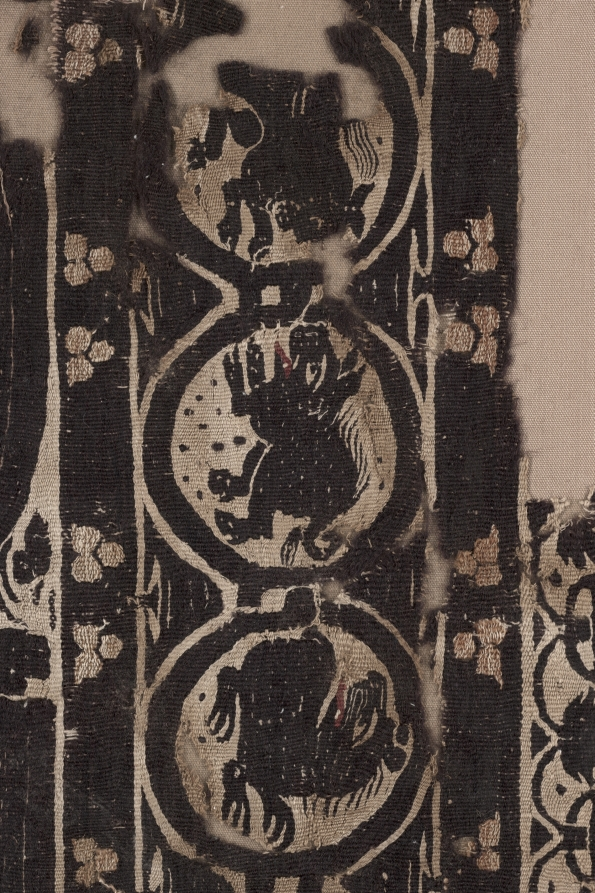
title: Curtain Panel with Scenes of Merrymaking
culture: Egypt, Byzantine period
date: 500s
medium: Linen, undyed; wool: dyed; tapestry weave with supplementary weft wrapping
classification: Textile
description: This large panel conveys merrymaking, wealth, and power through its symbolic imagery and deep purple color. It was originally part of a luxurious wide curtain with similar panels alternating with plain linen panels. Although woven in Christian Egypt, the panel is dominated by pagan subjects. A nude male stands beside a dancing female in transparent clothing in each of the three squares, alternating with centaurs (half-man, half-horse creatures) in roundels. In the central square, Dionysus, the god of wine, holds a grapevine and a weary Hercules leans on his club below. The lively animal imagery conveys wealth because few could afford animals such as lions, bulls, and hares.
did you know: The textile industry drove the Egyptian economy, dominated by the flax plant from which linen is derived.